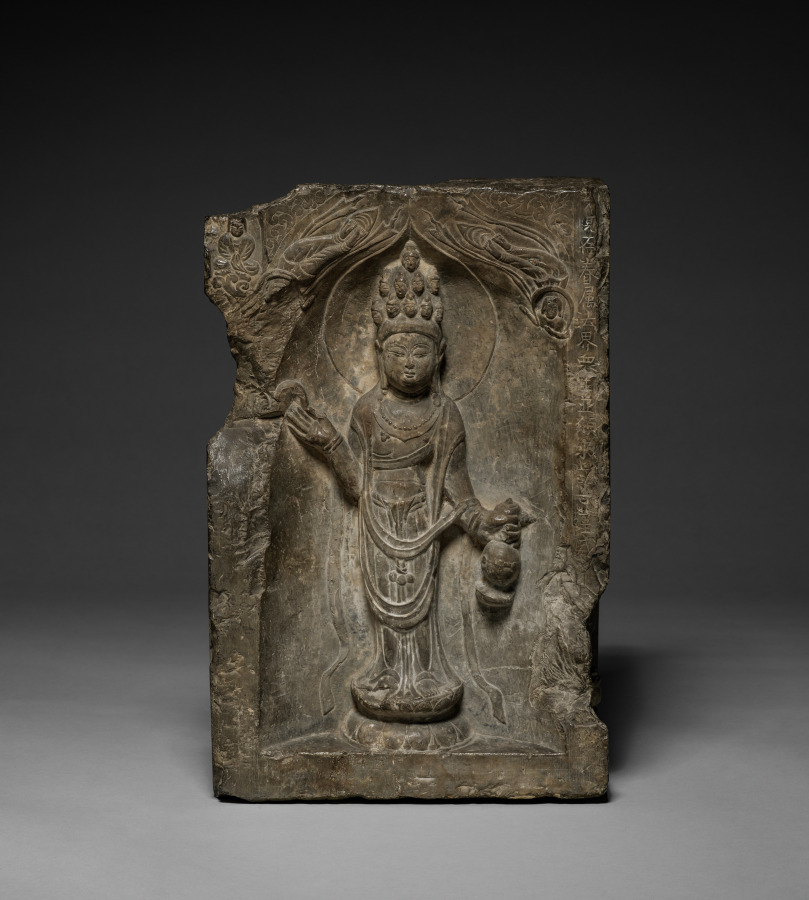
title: Corner Stone with Two Eleven-Headed Guanyin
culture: China, Tang dynasty (618-907)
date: c. 700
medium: stone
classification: Sculpture